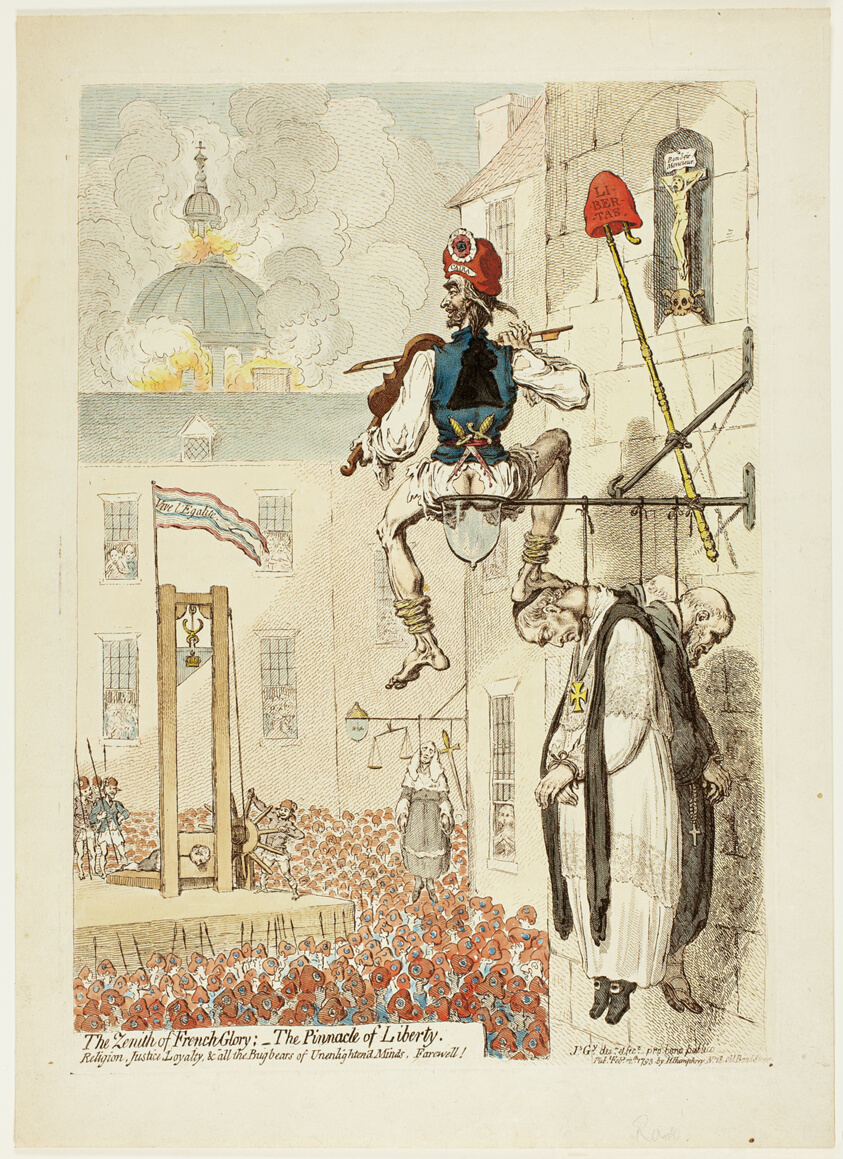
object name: Print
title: The Zenith of French Glory; The Pinnacle of Liberty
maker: James Gillray (English, 1756-1815); published by Hannah Humphrey (English, c. 1745-1818)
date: published February 12, 1793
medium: Etching in dark brown, with handcoloring, on cream wove paper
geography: England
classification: etching; print; prints and drawing